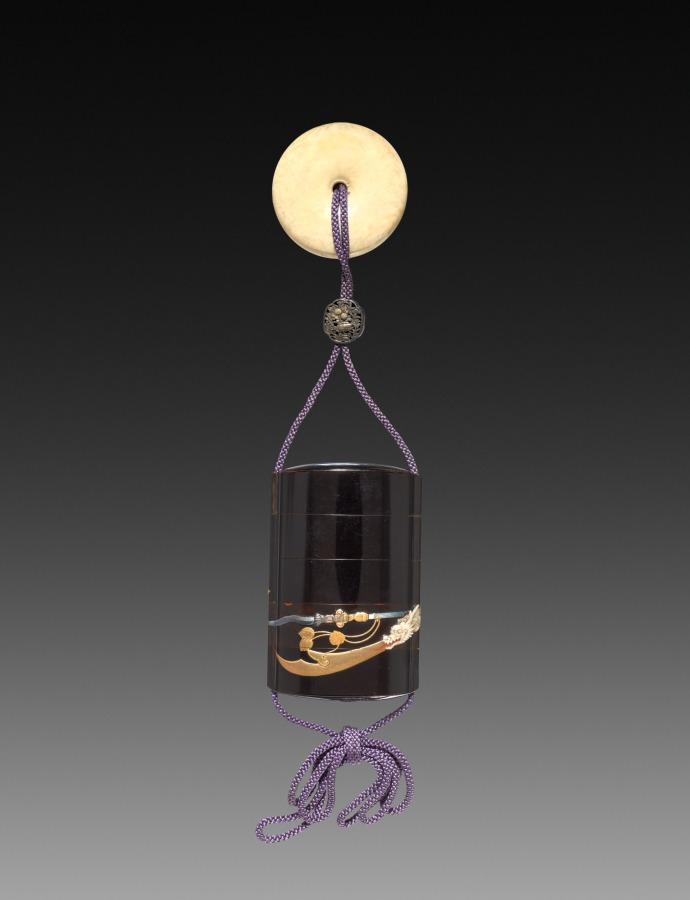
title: Inro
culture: Japan, Edo period (1615–1868)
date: 1615–1868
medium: lacquer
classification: Lacquer